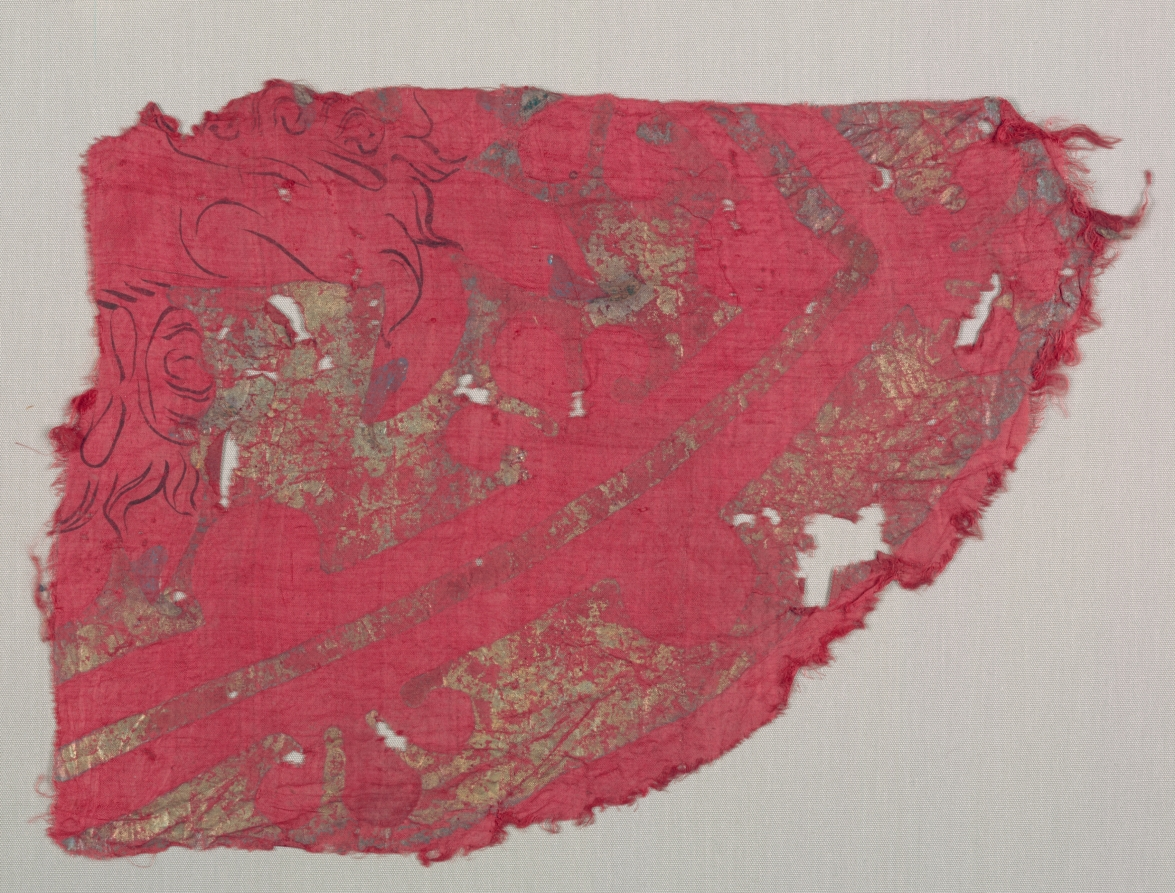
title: Printed Silk Fragment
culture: Unassigned, 5th century (?)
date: 400s(?) CE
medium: Silk: plain weave; gold leaf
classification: Textile